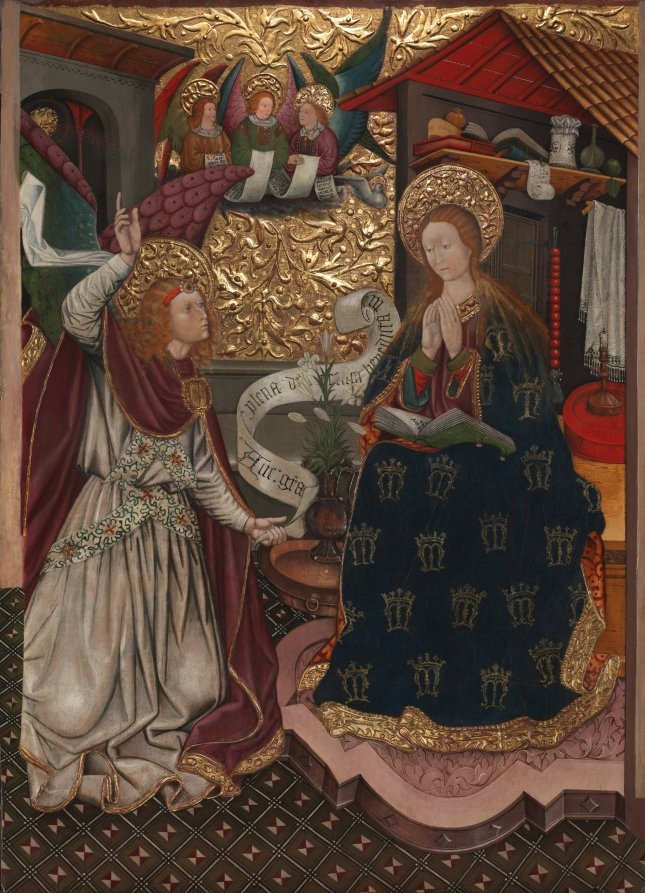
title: The Annunciation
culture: Spain, Catalonia, 15th century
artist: Jaume Ferrer the Younger (Spanish, Catalonia died c. 1460/70)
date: c. 1457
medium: oil, tempera, and gold on wood panel (fir)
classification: Painting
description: This and 1953.660.2 are believed to be the remaining components of a six-panel altarpiece. The large central panel is now preserved in Barcelona (Museu National d’Art de Catalunya). Ferrer collaborated with the painter Pere Garcia de Benavarri on this commission. Spanish works like these often feature elaborate treatment of the gold background, evident here in the exuberant raised decoration (called pastiglia) in the skies and the haloes, as well as other details. Here the archangel Gabriel proclaims the Virgin’s destiny as the mother of Christ. The setting is an ordinary house, but simple objects have symbolic meaning. The lilies represent the Virgin’s purity; the covered jar and water carafe symbolize inviolability; the pomegranate symbolizes Christ’s resurrection, while the apple alludes to humankind’s fall from grace. The towel and basin hint at ritual cleansing during Mass. The blown-out candle points to the arrival of divine light in the world. The two books, closed and open, refer respectively to the Old and New Testaments: one foretelling and the other fulfilling the promise of the messiah.